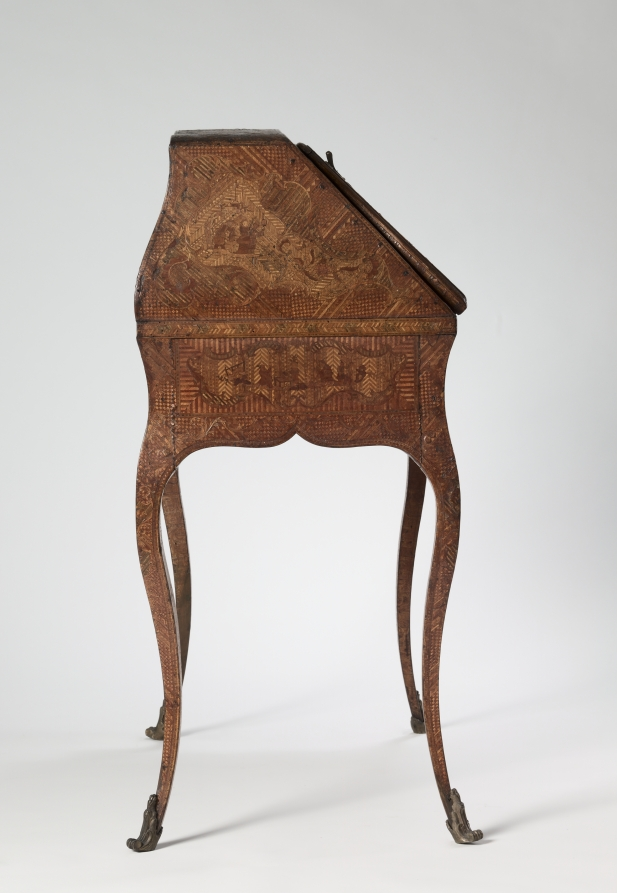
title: Ladies Writing Desk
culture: Possibly Northern Italy, near France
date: c. 1750–75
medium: Oak with straw marquetry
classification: Furniture and woodwork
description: As early as the beginning of the 17th century, straw marquetry was being produced throughout Europe. Along with cabinetmakers and specialized artisans, creators of straw marquetry included home artisans, nuns, monks, and noble dilettantes. Thus the quality and design of objects using straw marquetry is quite diverse. While some pieces appear nearly naive, others are made very masterfully, such as with this ladies writing desk. Some of these objects were even presented in royal cabinets of wonder. Because of its silky gloss and bright colors, straw marquetry was held in great esteem as unusual and remarkable decoration for furniture and other objects on par with gemstones, tortoiseshell, or ivory.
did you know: The surface of this ladies writing desk is completely covered with straw marquetry decoration both outside and in.